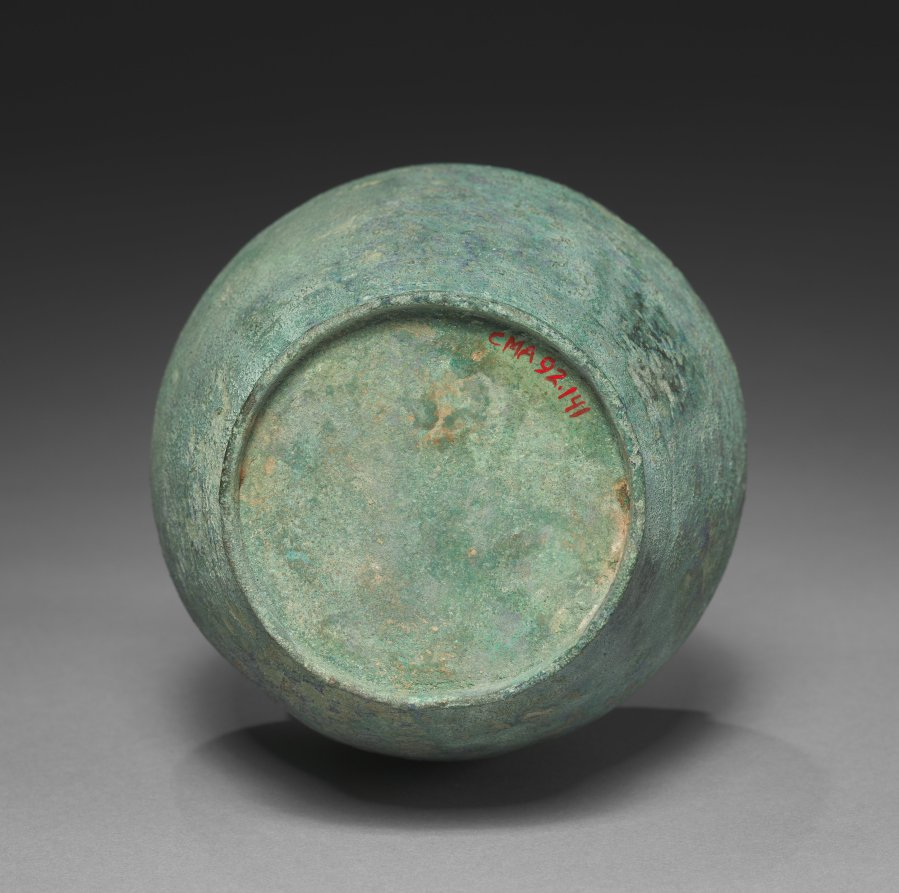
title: Water Ewer for Rituals (Kundika)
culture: Korea, Goryeo dynasty (918–1392)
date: 1100s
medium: bronze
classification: Metalwork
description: Known as kundika in Sanskrit, this distinctively shaped vessel served to purify a sacred space and to invoke a deity. In Korean Buddhist art, it appears primarily as an attribute of the Bodhisattva Avalokitesvara (Gwaneum in Korean). By the 12th century, however, it came to serve as aristocrats’ fancy water container for everyday use.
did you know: This distinctively shaped vessel is called a kundika in Sanskrit, simply referring to a water bottle.